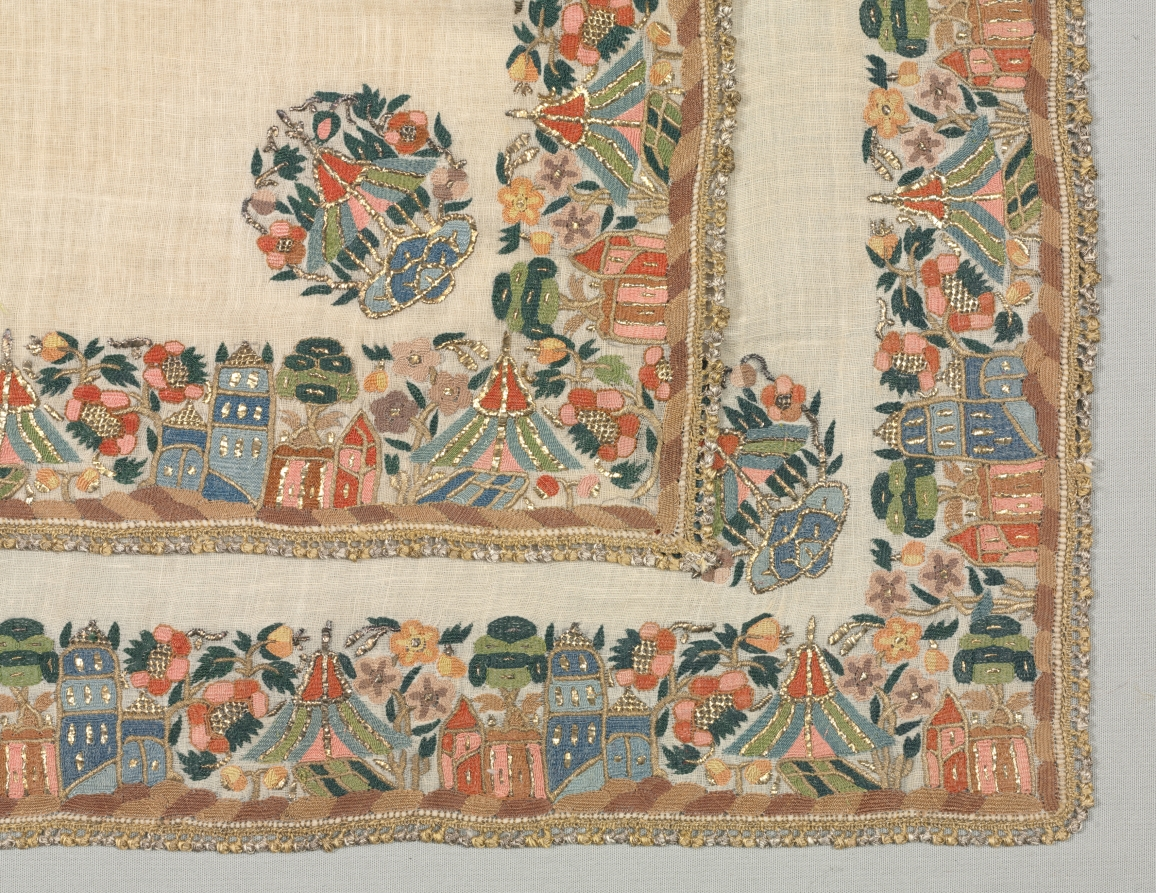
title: Embroidered head scarf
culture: Turkey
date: 1800s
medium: plain weave: linen; embroidery, double-running stitch: silk, gilt-metal strips and thread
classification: Embroidery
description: The edges of this headscarf are embroidered with landscape: a mosque alternates with a Turkish tent with a flowering plant between. In each corner is a medallion formed by a flowering plant surrounding a Turkish tent.